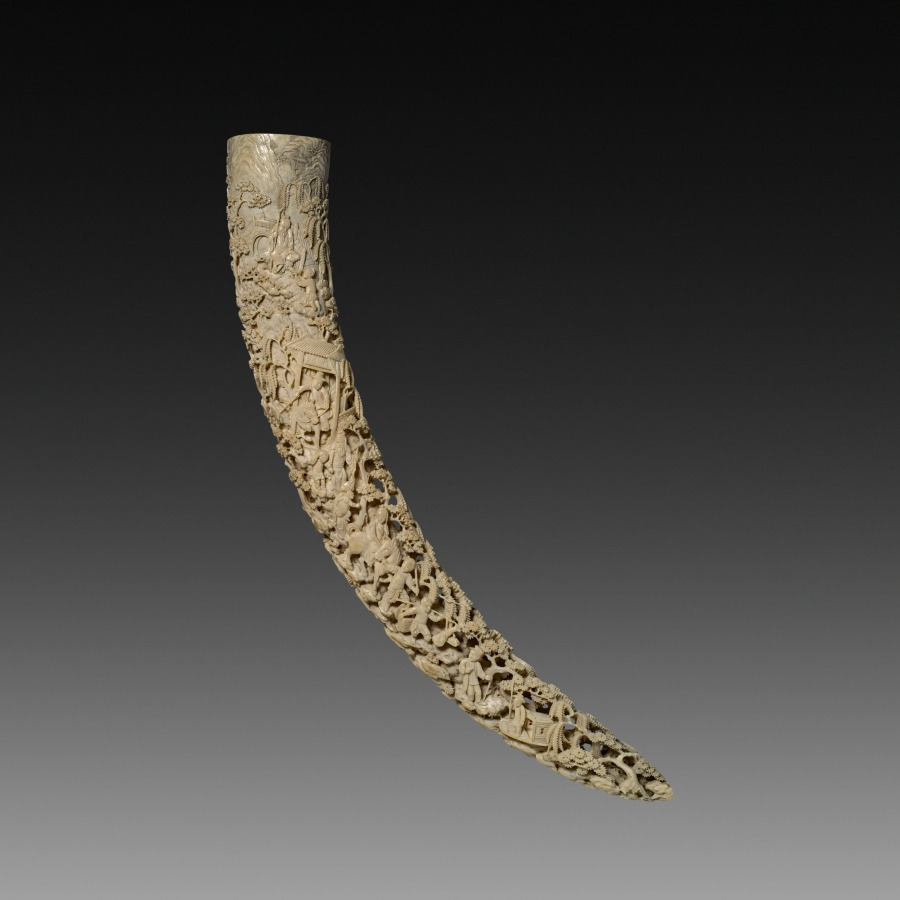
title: Tusk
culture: China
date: 1800s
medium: ivory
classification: Ivory